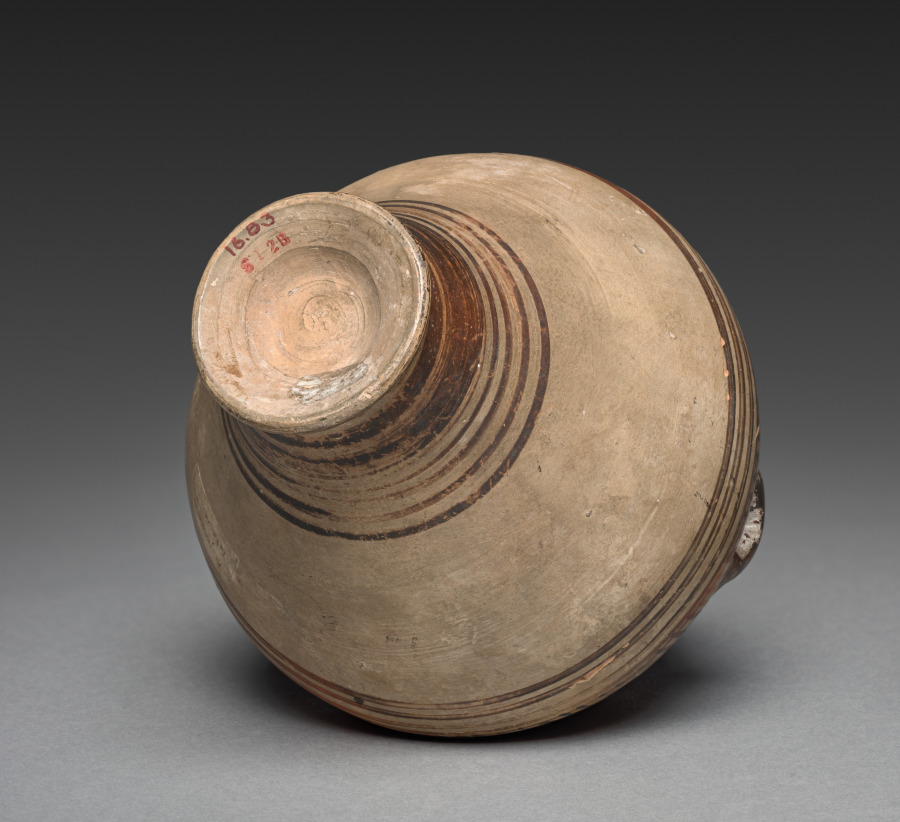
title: Three Handled Jar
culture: Cyprus, late Helladic III A1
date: c. 3200–c. 1050 BCE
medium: ceramic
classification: Ceramic